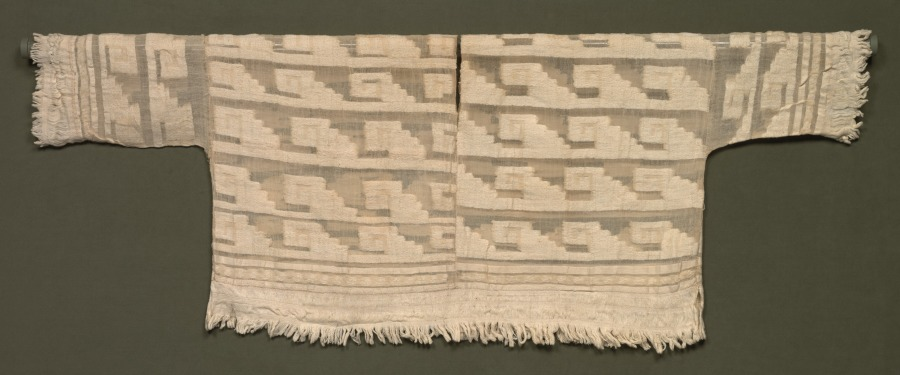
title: Tunic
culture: Peru, Chimú or Chimú-Inka, 12th-16th century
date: 1100–1532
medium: white cotton; plain weave with supplementary weft brocading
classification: Textile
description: This garment embodies an important principle of the Chimú textile aesthetic: a love of combining different textures, some dense and sculptural and others so open and airy they are nearly invisible. (The hand-spun yarns are only .1 to .2 millimeters in diameter.) It also elegantly articulates the simplified, spare visual vocabulary that the Chimú favored, here geometric motifs.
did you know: The Chimú forged an empire that thrived until the 1460s, when the Inka incorporated it into their own imperial domain.